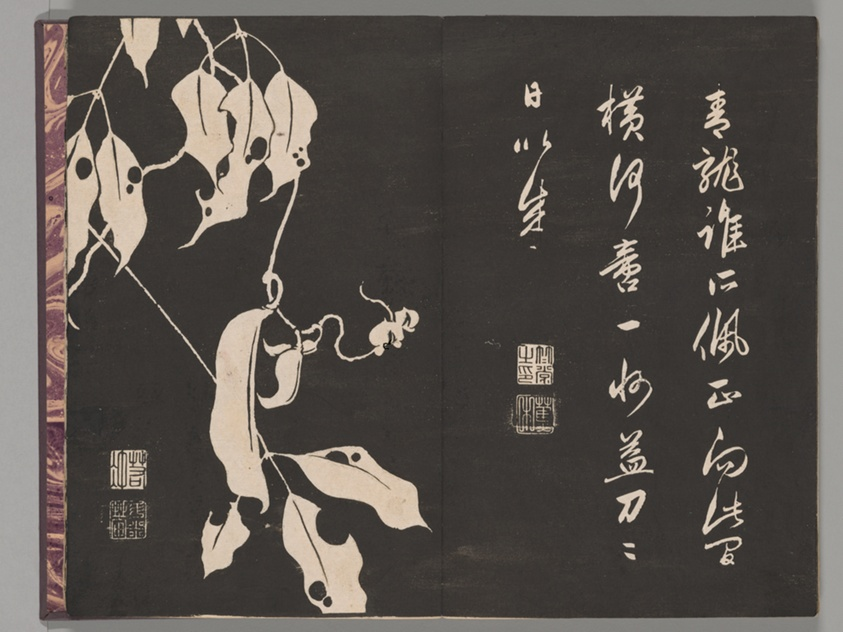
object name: Book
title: Soken sekisatsu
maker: Ito Jakuchu (Japanese, 1716-1800)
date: 1767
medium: Woodblock printed book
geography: Japan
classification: book